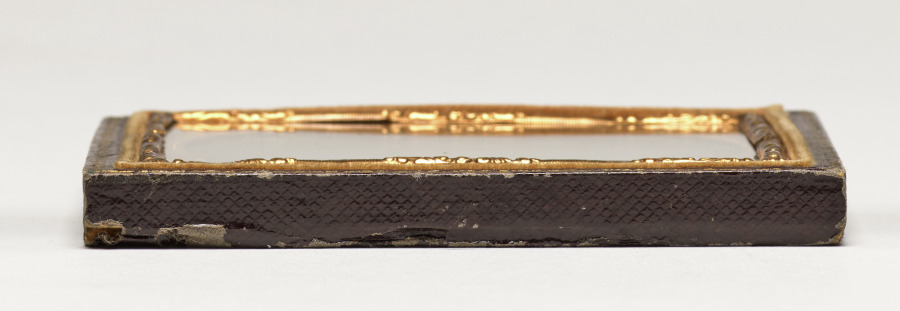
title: Mother and Child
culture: America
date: c. 1865–70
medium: ambrotype, tinted, sixth plate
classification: Photograph